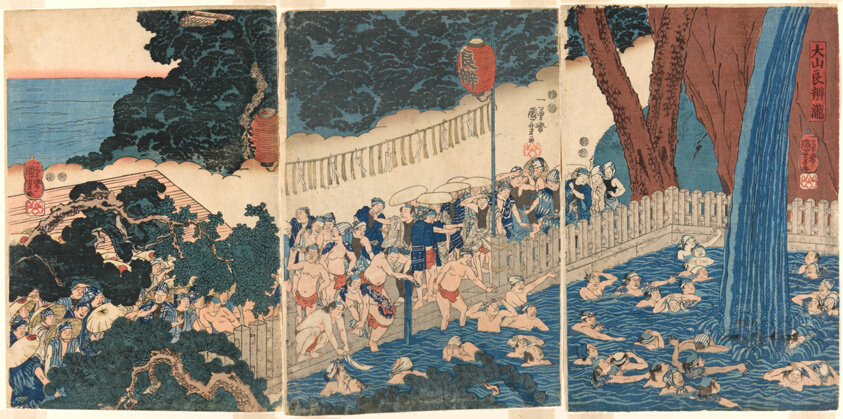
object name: Print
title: Roben Waterfall at Mount Oyama (Oyama Roben no taki)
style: Japanese (culture or style)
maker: Utagawa Kuniyoshi (Japanese, 1797–1861)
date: c. 1818/20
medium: Color woodblock prints; oban triptych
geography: Japan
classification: woodblock print; print; asian art